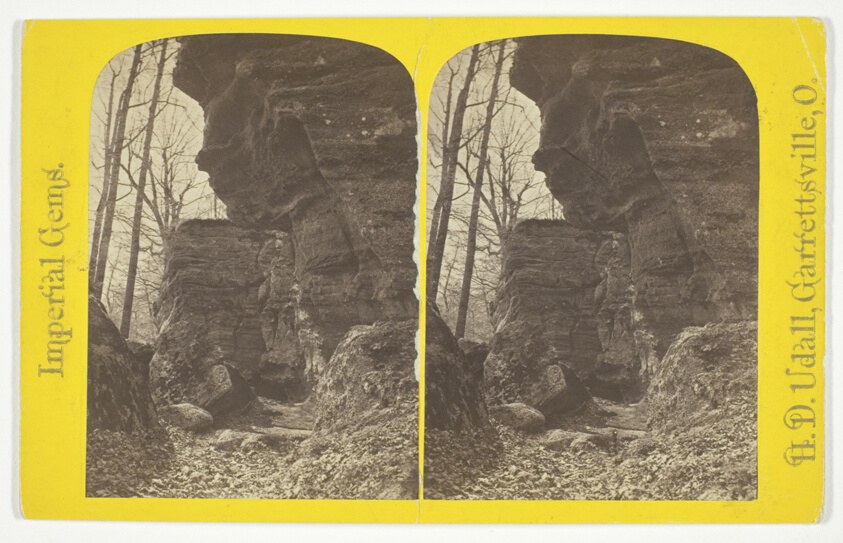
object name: Photograph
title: Furnace Rock, No. 3 from the series "Imperial Gems"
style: 19th century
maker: H. D. Udall; American, active late 19th century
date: 1875/99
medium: Albumen print, stereo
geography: Ohio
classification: photography; photograph